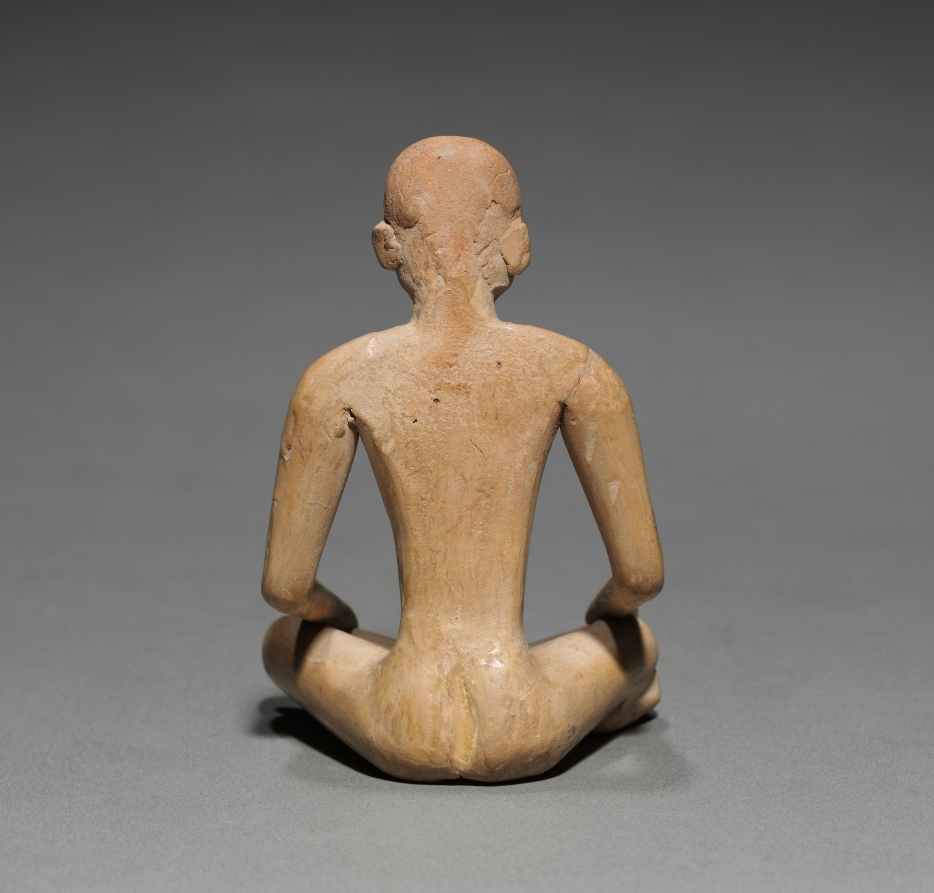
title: Seated Figurine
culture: Mexico, Gulf Coast, Huastec, Pánuco style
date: 1–700 CE (thermoluminescence date, 225–1055 CE)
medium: earthenware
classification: Sculpture